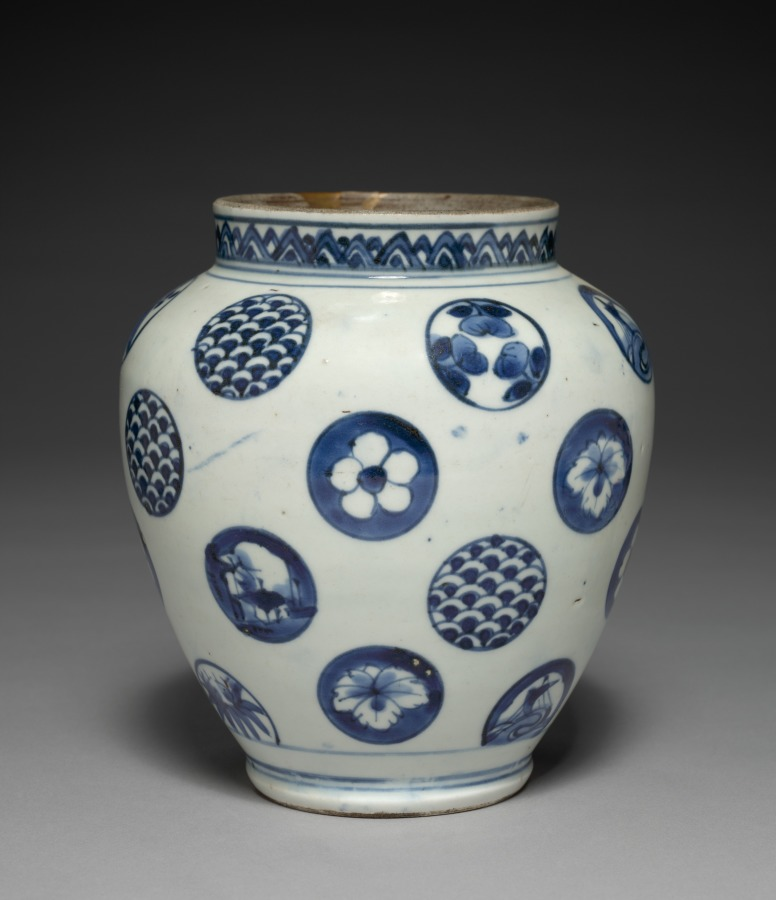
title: Jar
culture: Japan, Edo period (1615–1868)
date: early to mid-1800s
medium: porcelain with underglaze blue (Hizen ware, Arita type, Imari style)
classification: Ceramic